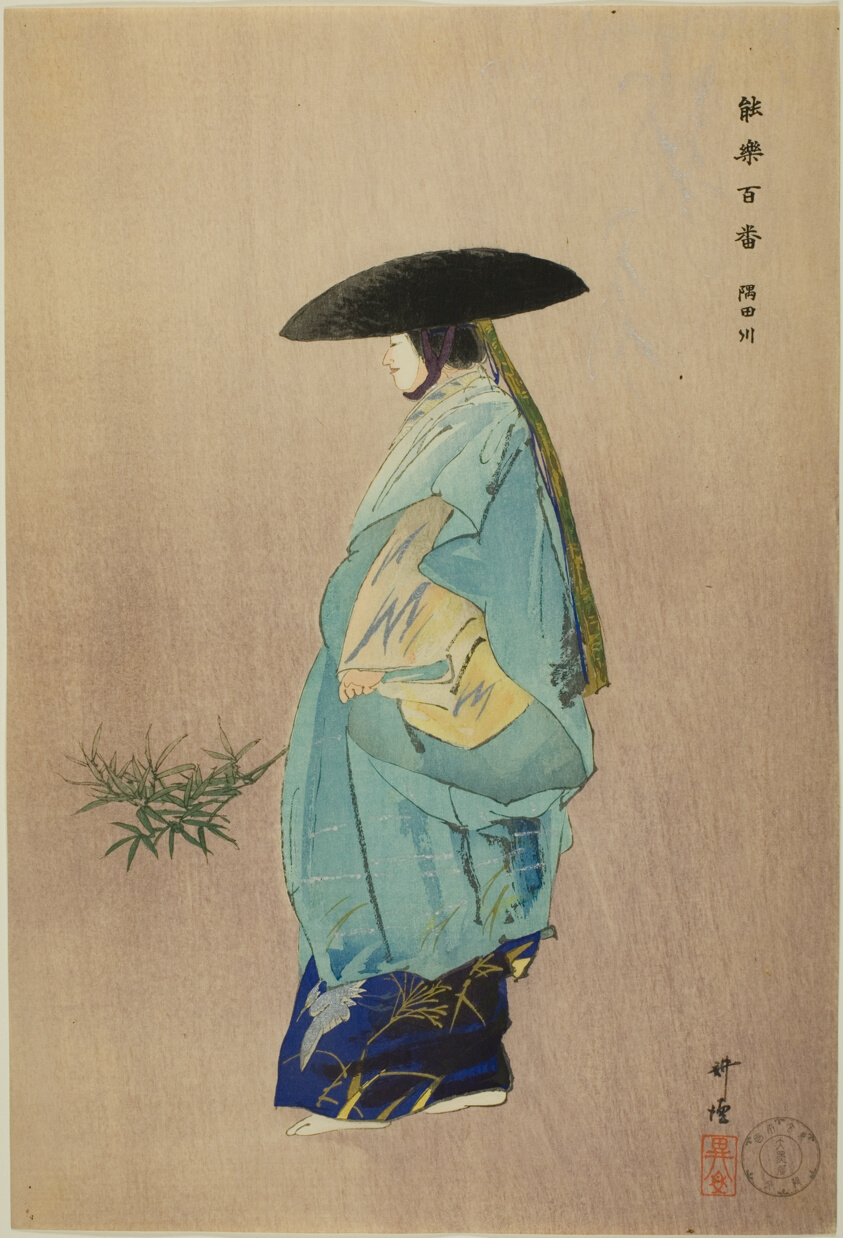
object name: Print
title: Sumidagawa, from the series "One Hundred No Dramas (Nogaku hyakuban)"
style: Japanese (culture or style)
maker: Tsukioka Kogyo; Japanese, 1869-1927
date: 1898/1903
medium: Color woodblock print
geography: Japan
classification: woodblock print; print; asian art